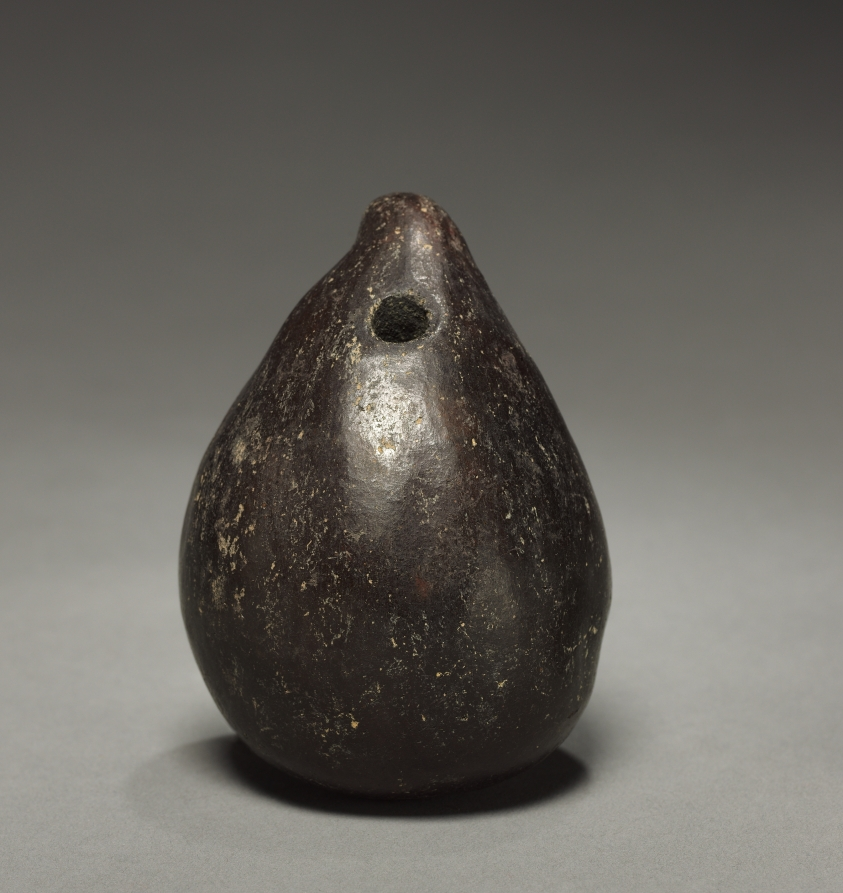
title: Fruit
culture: Colombia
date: before 1921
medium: pottery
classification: Ceramic